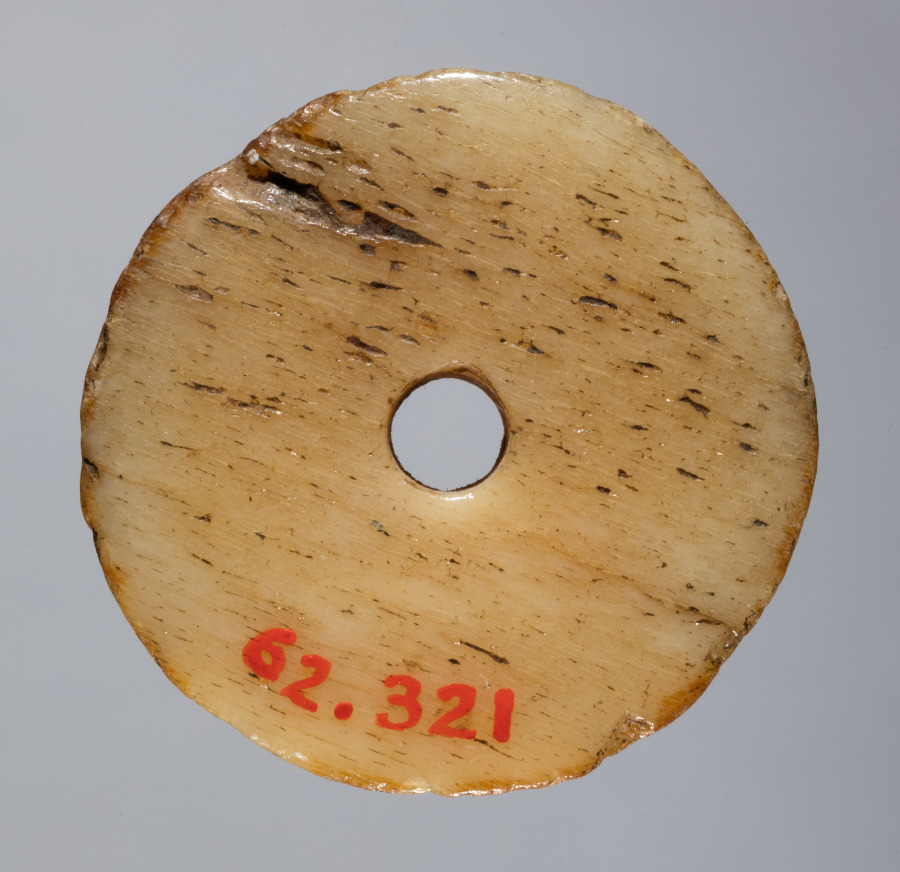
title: Spindle Whorl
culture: Iran, early Islamic period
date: 700s - 900s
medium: bone, incised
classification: Spindle Whorl